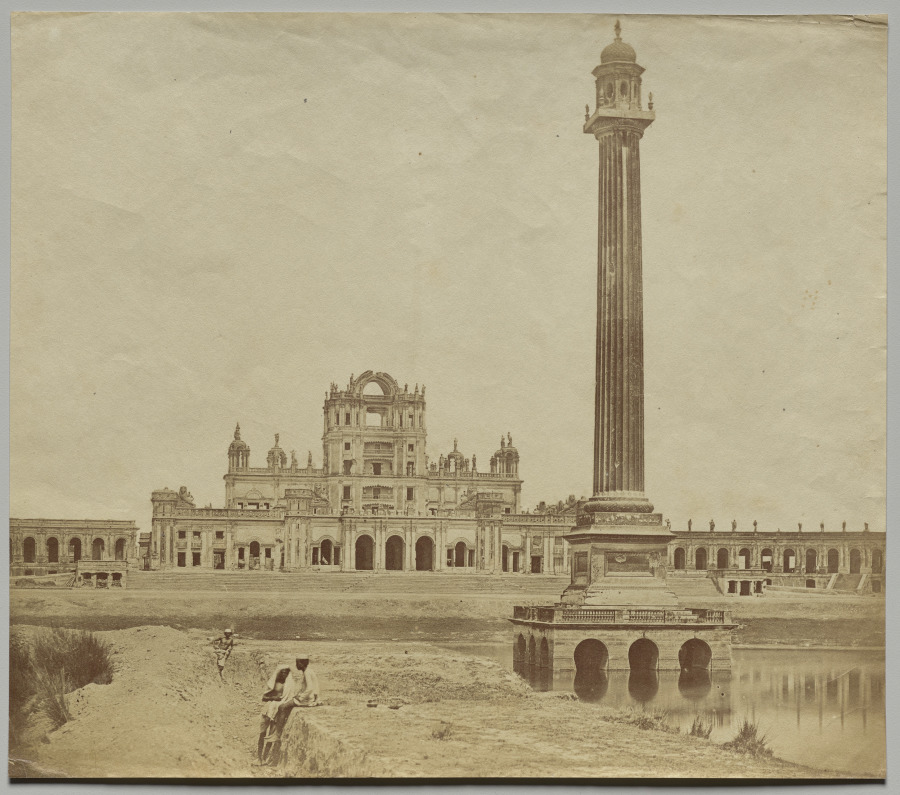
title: The Martinière School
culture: England, 19th century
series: Lucknow After the Siege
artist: Felice A. Beato (British, 1832–1909)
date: 1858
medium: albumen print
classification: Photograph